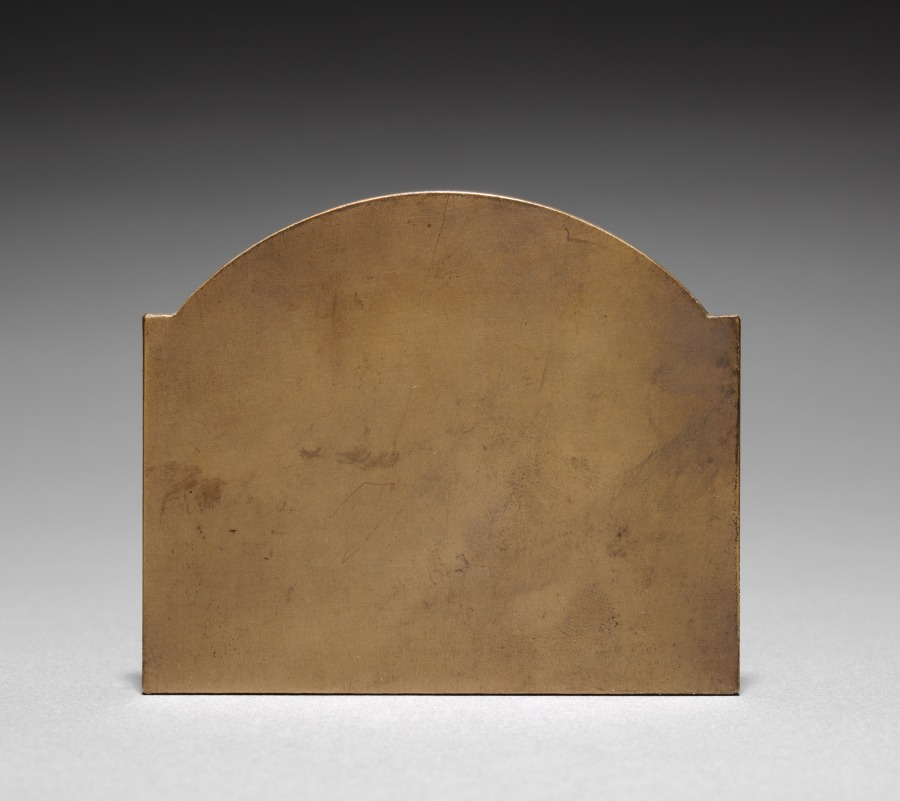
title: Medallion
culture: France, 19th-20th century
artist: Henri Emile Allouard (French, 1844–1929)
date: c.1915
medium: bronze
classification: Metalwork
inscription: "Pro Patria" (For our country); signed: "H. Allouard."